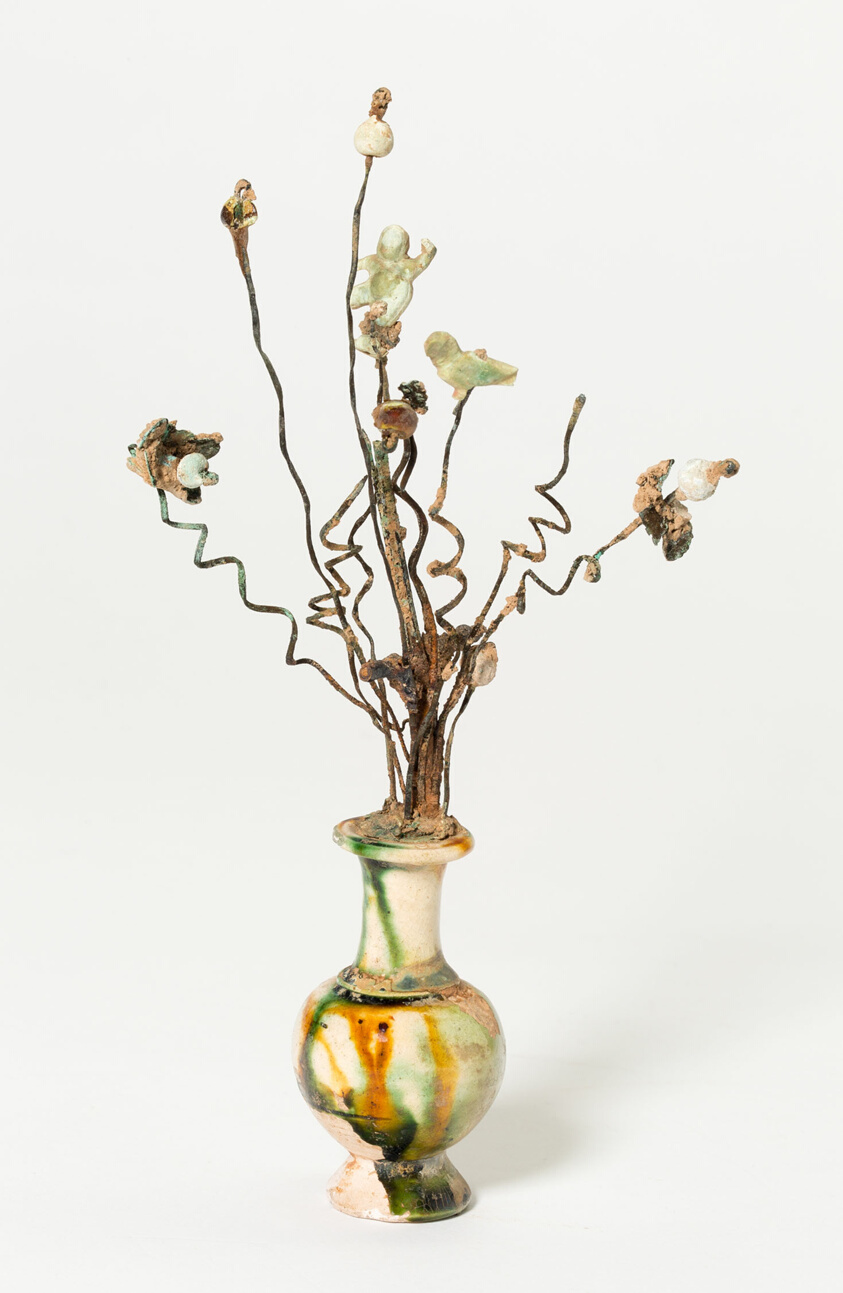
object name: Vessel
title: Miniature Vase with Wire Strands and Variegated Materials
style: Chinese (culture or style)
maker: China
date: Tang dynasty (618–907)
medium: Earthenware with three-color (sancai) lead glazes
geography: China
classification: vase; vessel; asian art; ceramics